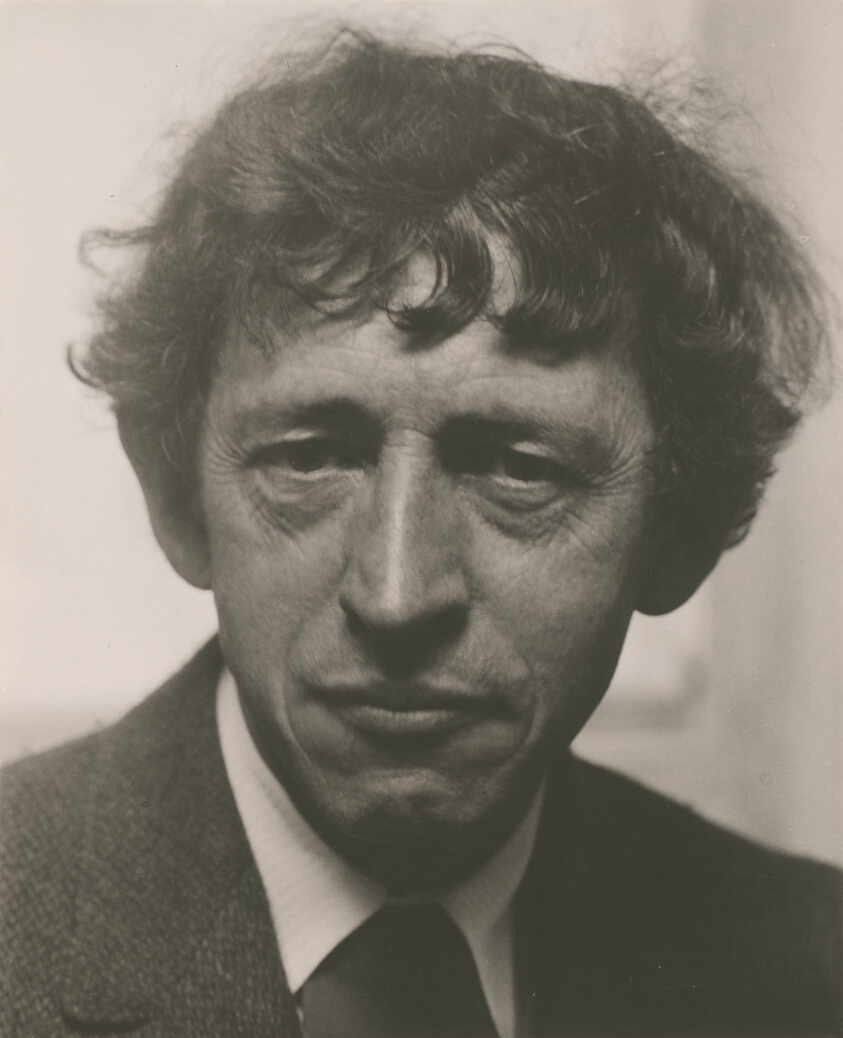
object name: Photograph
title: John Marin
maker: Alfred Stieglitz (American, 1864–1946)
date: 1921/22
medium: Gelatin silver print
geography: United States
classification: gelatin silver (developing-out-paper) pr; photographic process; photography; photograph